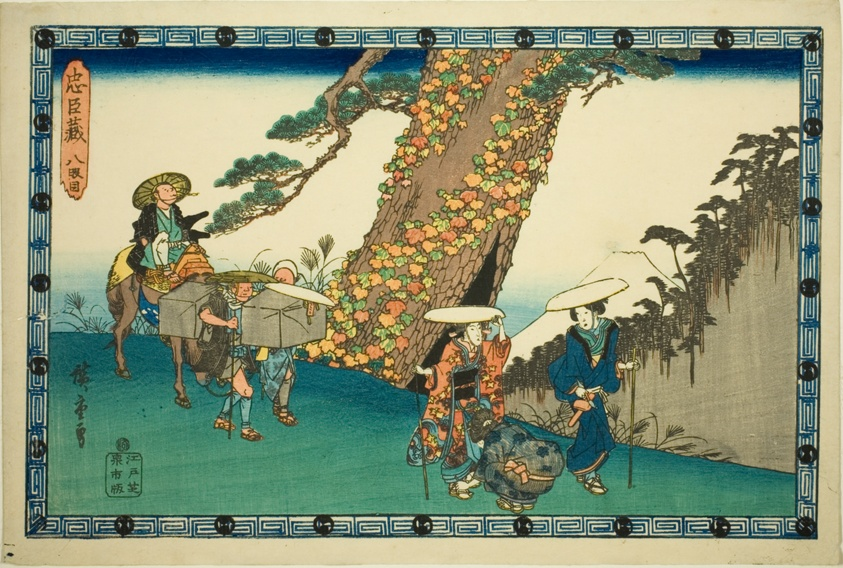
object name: Print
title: Act 8 (Hachidanme), from the series "The Revenge of the Loyal Retainers (Chushingura)"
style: Japanese (culture or style)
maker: Utagawa Hiroshige 歌川 広重; Japanese, 1797-1858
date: c. 1834/39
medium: Color woodblock print; oban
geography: Japan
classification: woodblock print; print; asian art